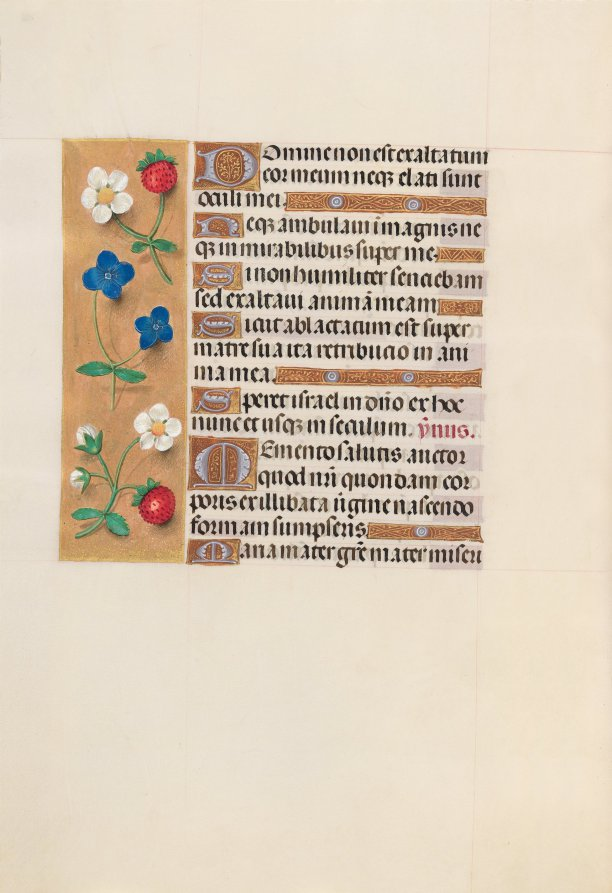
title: Hours of Queen Isabella the Catholic, Queen of Spain: Fol. 156v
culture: Flanders, Ghent and Bruges, late 15th century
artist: Master of the First Prayerbook of Maximillian (Flemish, c. 1444–1519)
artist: and Associates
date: c. 1500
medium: ink, tempera, and gold on vellum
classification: Bound Volume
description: This manuscript was illuminated by a circle of at least five highly organized manuscript painters active in the Flemish cities of Ghent and Bruges. The principal illuminator was Alexander Bening, who painted the majority of the book's miniatures. Manuscripts produced by this circle of artists are renowned for the decoration of their borders, which typically feature a rich variety of realistically-painted flowers, birds, and butterflies. This prayer book, called a book of hours, was intended not for a cleric, but for the private devotions of a lay person-in this case, Isabella the Catholic, Queen of Spain (1451-1504). Isabella's coat of arms embellishes the book's frontispiece. It is unlikely that the book was commissioned by the Queen herself; rather, she probably received it as a diplomatic gift from someone courting her patronage, perhaps Cardinal Francisco Jimenez de Cisneros. A Franciscan friar, Jimenez was dependent upon Isabella for his advancement, first to the post of Queen's confessor in 1492, and then to Archbishop of Toledo in 1495.